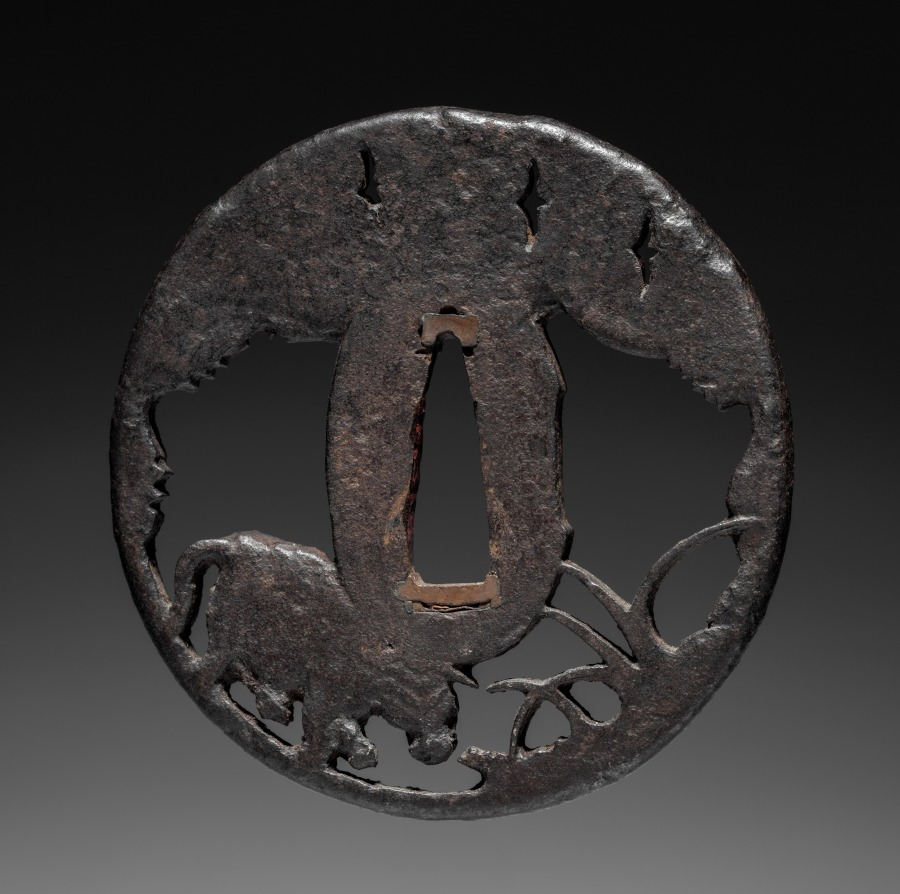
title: Sword Guard (Tsuba) with Ox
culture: Japan, possibly Edo period (1615-1868)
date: c. 1615–1868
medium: iron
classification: Arms and Armor